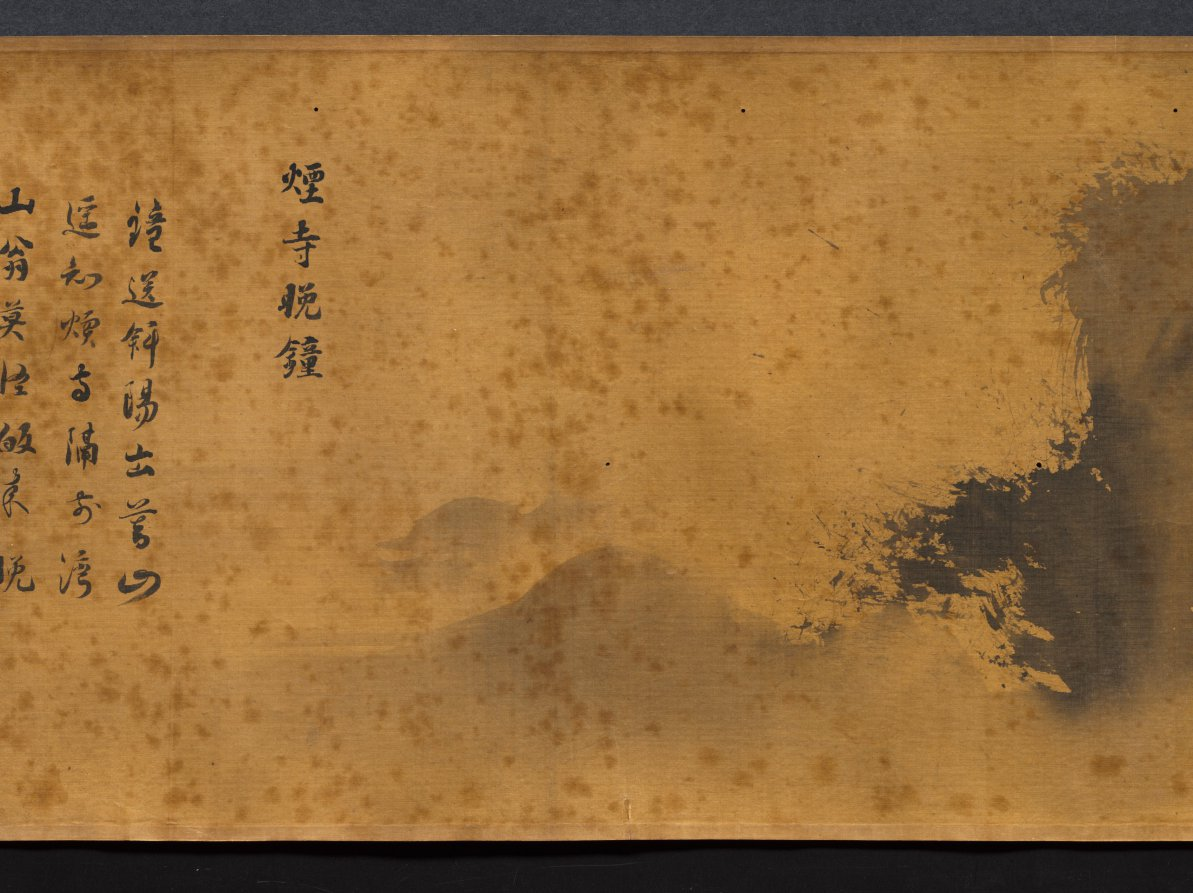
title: Eight Views of Xiao-Xiang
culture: Japan, Edo period (1615–1868)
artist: Kano Tan’yū (Japanese, 1602–1674)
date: 1615–1868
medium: handscroll; ink on silk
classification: Painting